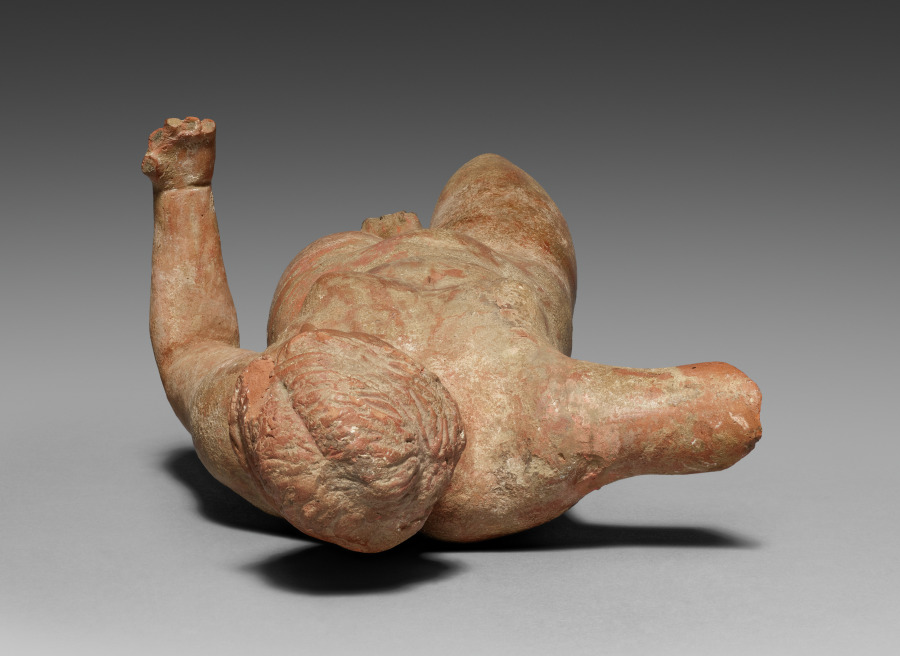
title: Aphrodite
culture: Greece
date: 400–200 BCE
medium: terracotta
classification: Sculpture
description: This nude figurine was likely inspired by the Aphrodite of Knidos by Praxiteles, a work that spawned countless reproductions of varying sizes in different media. Created from inexpensive terra cotta clay, this Aphrodite might have been commissioned as a votive offering by a person of modest means.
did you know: This Aphrodite may be admiring her reflection in a mirror once held in her left hand.